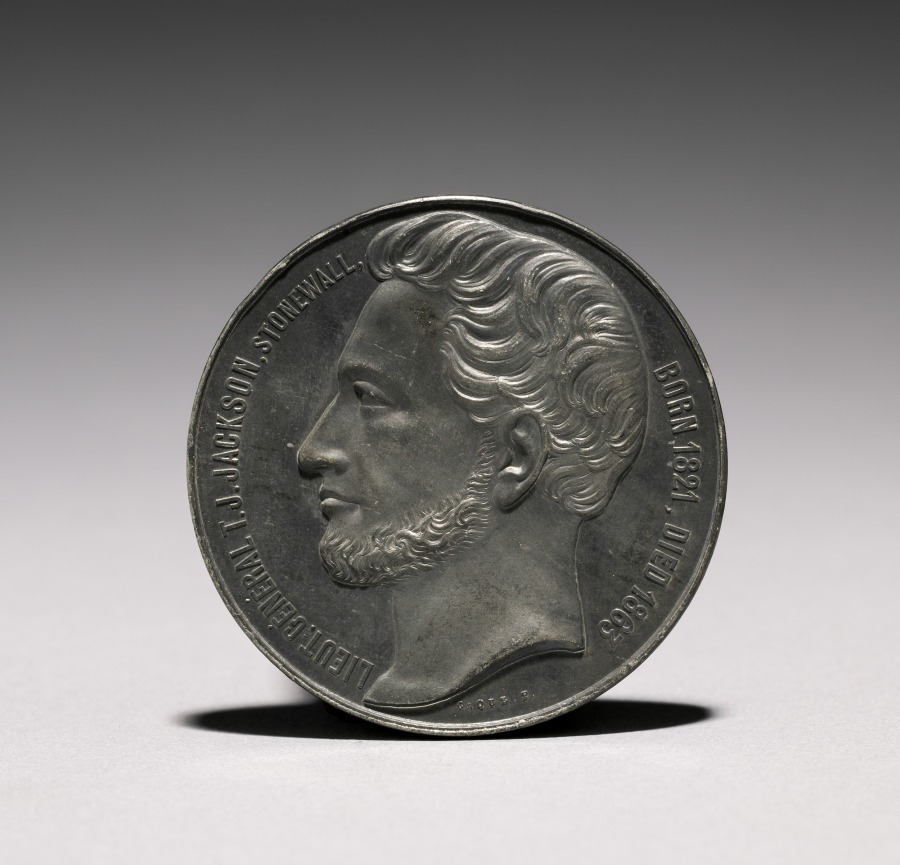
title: Medal: Lieutenant General T. J. Jackson (obverse)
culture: France, 19th century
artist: Armand Auguste Caqué (French, 1793–1881)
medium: bronze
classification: Metalwork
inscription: Lieut. General T. J. Jackson, Stonewall. Born 1821. Died 1863.